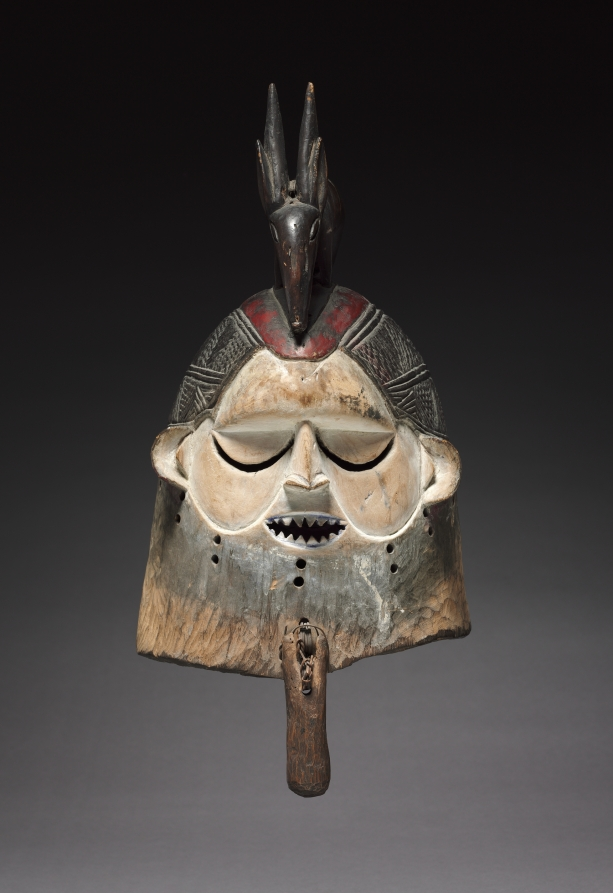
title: Mask (hemba)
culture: Africa, Central Africa, Democratic Republic of Congo, Suku-style carver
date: late 1800s–early 1900s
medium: Wood, reed, paint, and metal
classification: Mask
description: Suku helmet masks are often used in initiation ceremonies for young men in the society. Helmet masks such as this represent images of deceased elders in the society. They are to ensure successful hunting, help cure illnesses, and protect its wearer from evil. The animal shaped like a gazelle or antelope is typically associated with folktales, proverbs, and personal hunting exploits.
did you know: Suku helmet masks are often used in initiation ceremonies for young men in the society.